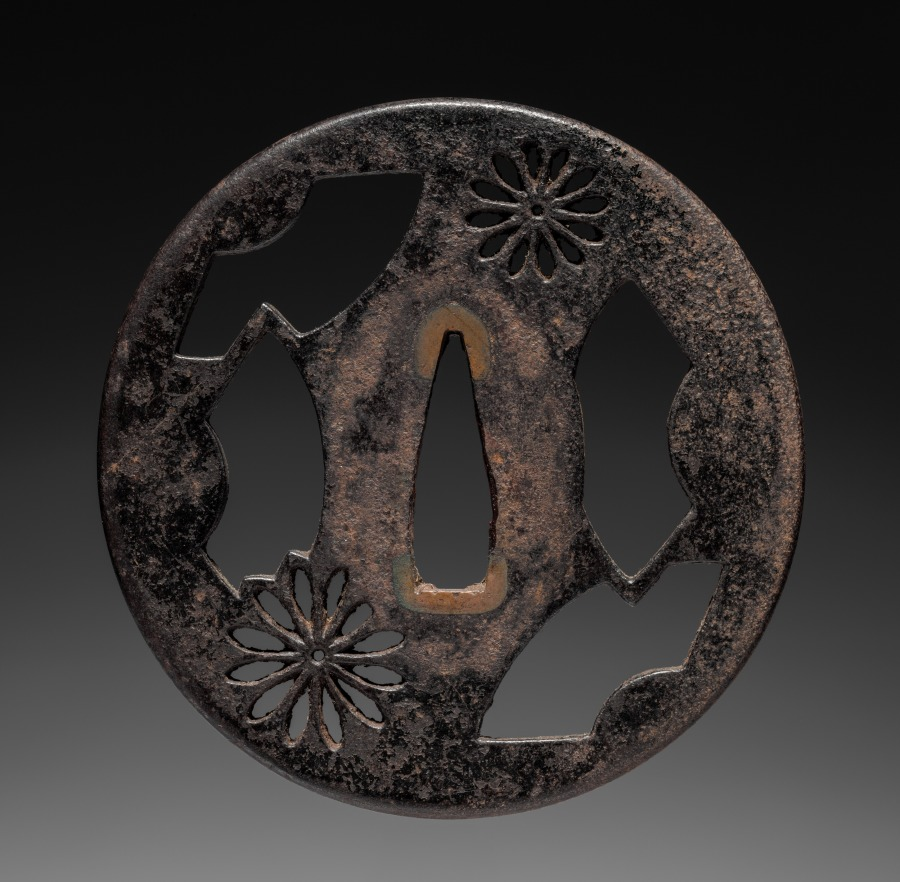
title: Sword Guard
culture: Japan, Edo period (1615–1868)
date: early 1700s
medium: iron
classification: Arms and Armor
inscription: Signature: Suruga, residing in Inaba province, made